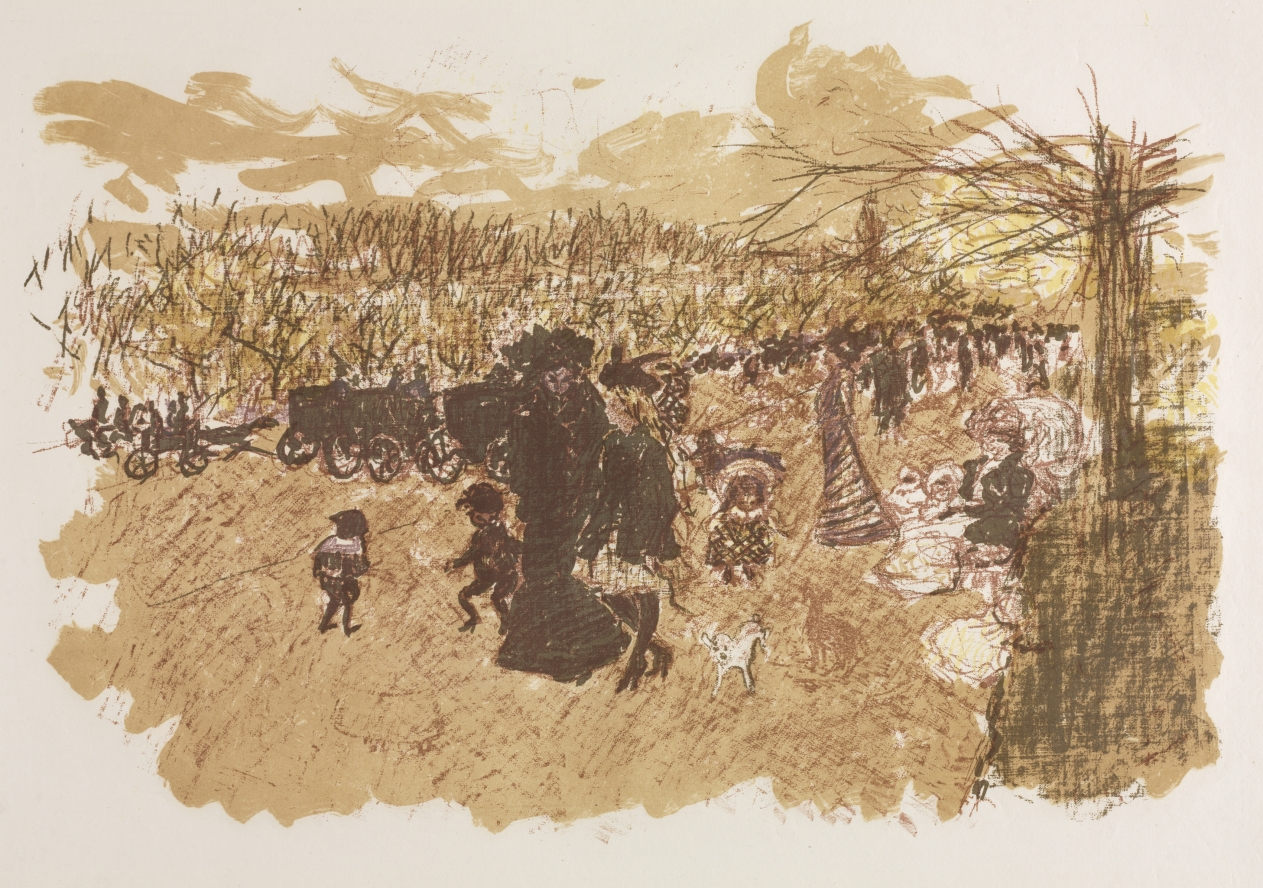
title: Avenue du Bois de Boulogne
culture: France, 19th century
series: Some Scenes of Parisian Life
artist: Pierre Bonnard (French, 1867–1947)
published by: Published by Ambroise Vollard; Printed by Auguste Clot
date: 1899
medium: lithograph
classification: Print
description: This suite of color lithographs collected Pierre Bonnard’s observations of city life, ranging from animated street scenes to distant observations glimpsed from the artist’s Montmartre studio window. Rather than memorializing the famous monuments of Paris, Bonnard preferred to depict small neighborhood scenes populated by urbanites shopping and strolling and by vendors selling their wares. The setting for one of the prints is the second-largest public park in Paris, the Bois de Boulogne, which was a popular place for families to relax, stroll, and enjoy carriage rides around the lakes. Two prints are nocturnal scenes in which gaslight emanating from shop windows is reflected on the wet streets, creating passages of bright yellow in the otherwise dark compositions. Bonnard’s favorite subjects, such as the Parisienne—a young, fashionable, modern woman—as well as children and dogs, appear repeatedly throughout the prints in the suite.